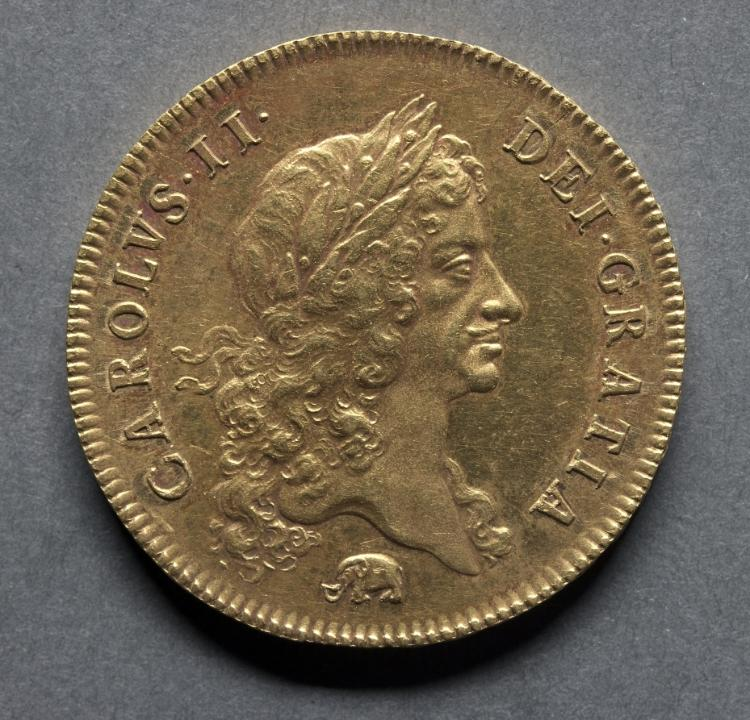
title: Five Guineas: Charles II (obverse)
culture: England, Charles II, 1660-1685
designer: John Roettier (British, 1631–1703)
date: 1668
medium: gold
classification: Coins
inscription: CAROLVS . II. DEI . GRATIA.